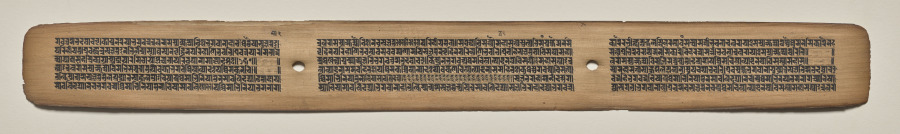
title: Text, Folio 124 (recto), from a Manuscript of the Perfection of Wisdom in Eight Thousand Lines (Ashtasahasrika Prajnaparamita-sutra)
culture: Eastern India, Bihar, Vikramashila Monastery. Painting: Nepal, Kathmandu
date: Sunday, September 14, 1119 (year 239 of the Newar Samvat in the month of Ashvina)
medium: gum tempera and ink on palm leaves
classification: Painting